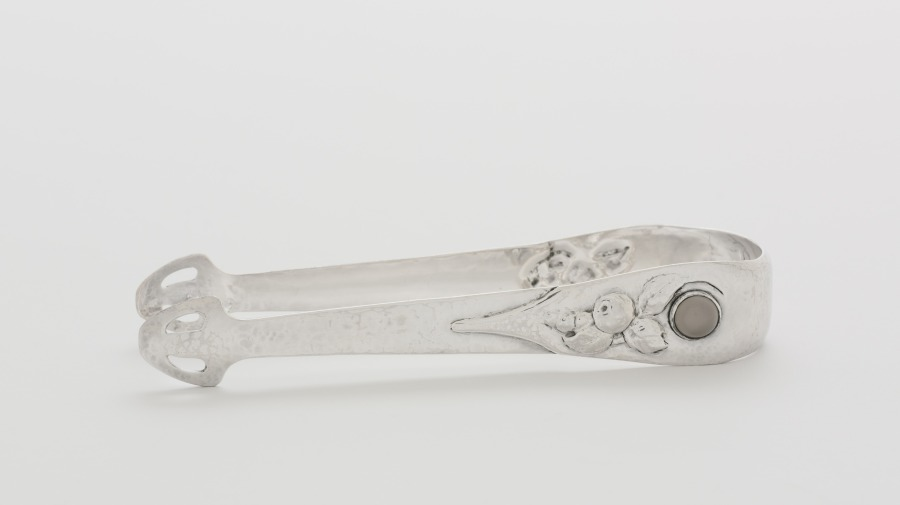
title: Tongs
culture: America, Ohio, Cleveland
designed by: Louis Rorimer (American, 1872–1939)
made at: and Rokesley Shop (American)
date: c. 1910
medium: silver, moonstones, ebony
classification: Silver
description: This tea and coffee service was designed for production by the Rokesley Shop, a collaborative group working at Louis Rorimer’s studio. Reacting against industrial mass production, Rorimer emphasized inventive design in finely crafted objects.